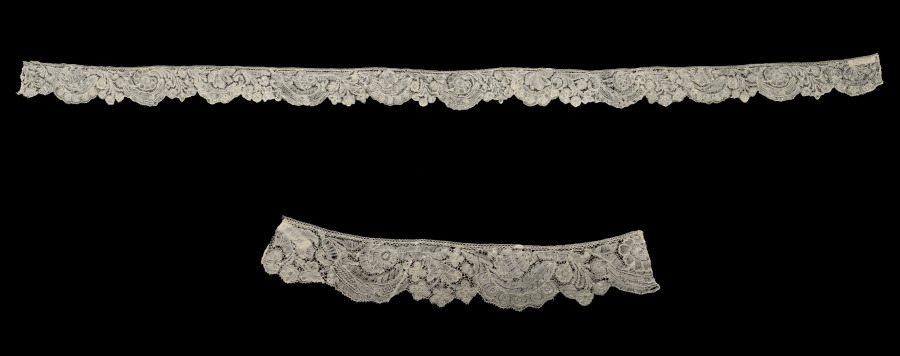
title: Lace Edging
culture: England, Devonshire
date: 1740–60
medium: Bobbin lace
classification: Lace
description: Although made in Great Britain, this lace copies Brussels' Point d'Angleterre lace.